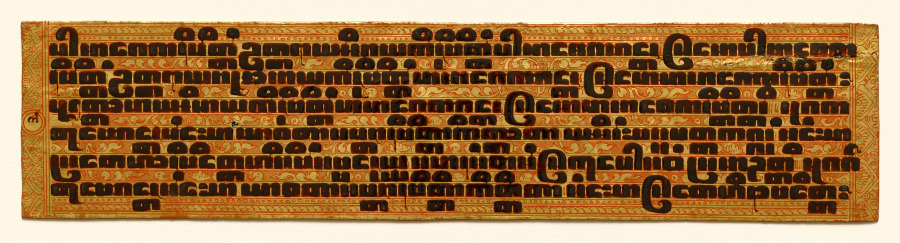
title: Text, folio 11 (verso) from a Kammavacha: Buddhist ordination text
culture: Myanmar (Burma)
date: 1800s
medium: Leaf: lacquer and gilding on cloth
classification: Manuscript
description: In premodern Burma, lay people commissioned lavishly ornamented manuscripts for ceremonial occasions, when officiants would read aloud from the text. Written in black lacquer, the text is in the language of Pali written in a Burmese script. It contains ordination rites and procedures for monastic ceremonies. The second to last page is covered with intricately drawn, winged celestial beings (nats) in gestures of praise. They fly amid intertwining vegetation—denoting bounty—that grows from serpentine forms that refer to rain clouds. Lionlike forms inhabit the space with them. The top and bottom covers are equally ornamented with jeweled floral patterning.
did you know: The Pali text of this manuscript is written in Burmese square script, which is also known as "tamarind seed script."